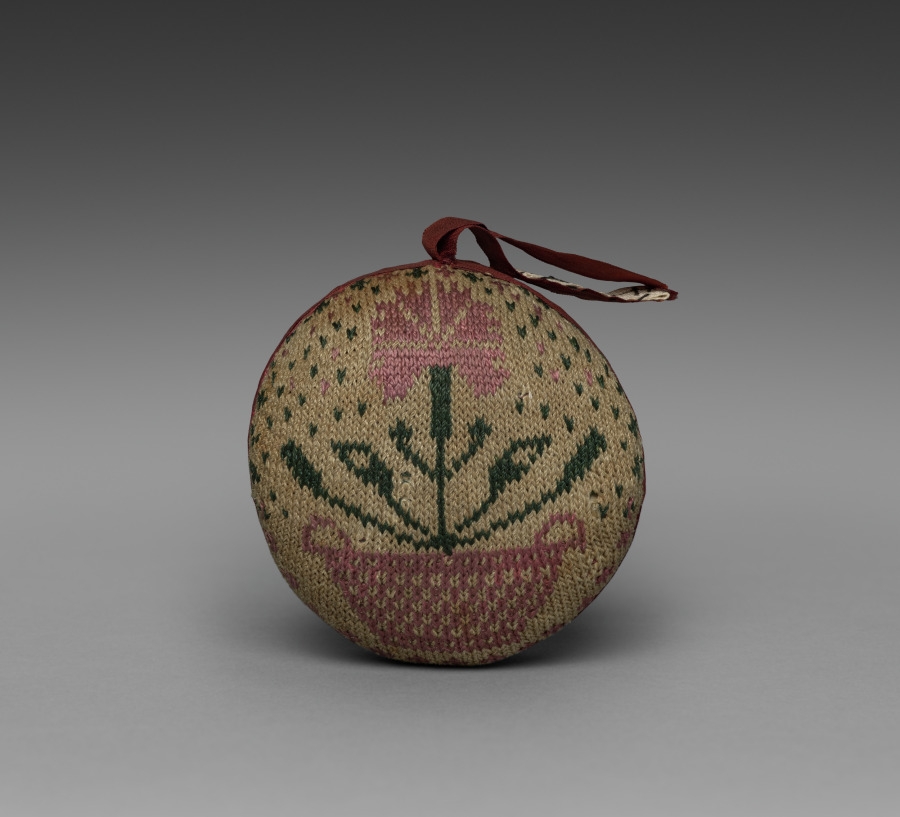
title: Pin Cushion Sampler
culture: England, 19th century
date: 1809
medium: Silk, knitted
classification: Sampler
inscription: "MARY WILLIAMSON 1809."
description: There is an inscription knit into this pin cushion, with the name Mary Williamson and the date 1809.